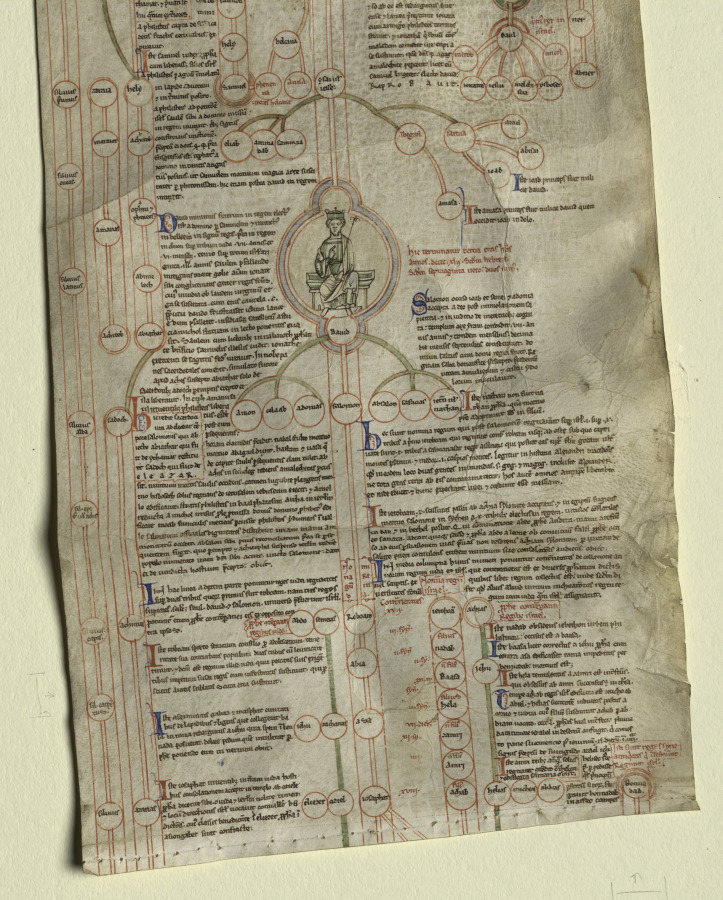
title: Peter of Poitiers's "Compendium Historiae in Genealogia Christi"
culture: England, Canterbury, 13th century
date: c. 1220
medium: ink and tempera on a vellum roll of four membranes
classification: Manuscript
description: This manuscript roll, composed of four membranes formerly stitched together in a continuous roll about nine feet long, has been divided in the middle for easier visibility and study. The text is an abridgment of biblical history focused on the descent of Christ from Adam. It was written by Peter of Poitiers (about 1130–1205), who taught theology and history in Paris and was widely copied. The present roll is an English copy of Peter's text made shortly after his death. Although manuscript rolls were hung on the walls of a classroom as instructional aids to students, some of them have value beyond their textual and historical interest because of the fine quality of their drawings, as seen here. A comparison with Canterbury manuscripts and stained glass of around 1220 is the basis for the attribution to Canterbury. Peter of Poitiers's aim in this project was to assist students prevented from mastering biblical history because of its length and because they were too poor to own books. His text on roll is the briefest possible summary of biblical history. It is arranged in six historical stages, denoting the six ages of the world, as decreed by theological tradition. The first five ages were inaugurated by Old Testament individuals: Adam, Noah, Abraham, David, and Sedecias. The birth of Christ heralded the sixth stage. Beginning at the top of the first membrane, the text consists of brief biographical entries on the ancestors of Christ (Adam, Noah, Abraham, Moses, and David) and other biblical personalities. These extend to the birth of Christ on the fourth membrane, ending with accounts of Hebrew and Roman kings and the Apostles. Each compendium shows the names of the ancestors inscribed within circles, those of direct descent placed vertically in a central column, others scattered in clusters to the right and left. The decoration of the roll consists of a series of medallions of diverse geometrical frames filled with either a figural drawing or a diagram. The style of these pen-and-ink drawings, some illuminated in tempera or tinted with wash, stems from English manuscript and glass painting attributed to the school of Canterbury Cathedral. The style of the museum's illustrations is so close to the stained glass panels made for Trinity Chapel at Canterbury (about 1220) to suggest that an artist active as a glazier in the Cathedral workshop may also have executed the manuscript. In the least, the painter of the roll manuscript was familiar with the style of the painted glass, and on this basis, a date of about 1220 seems appropriate. Additional evidence is supplied by a psalter illuminated at Canterbury shortly before 1220. The figurative scenes in this psalter were apparently illustrated by the same hand that executed the line and wash drawings in the museum's roll.